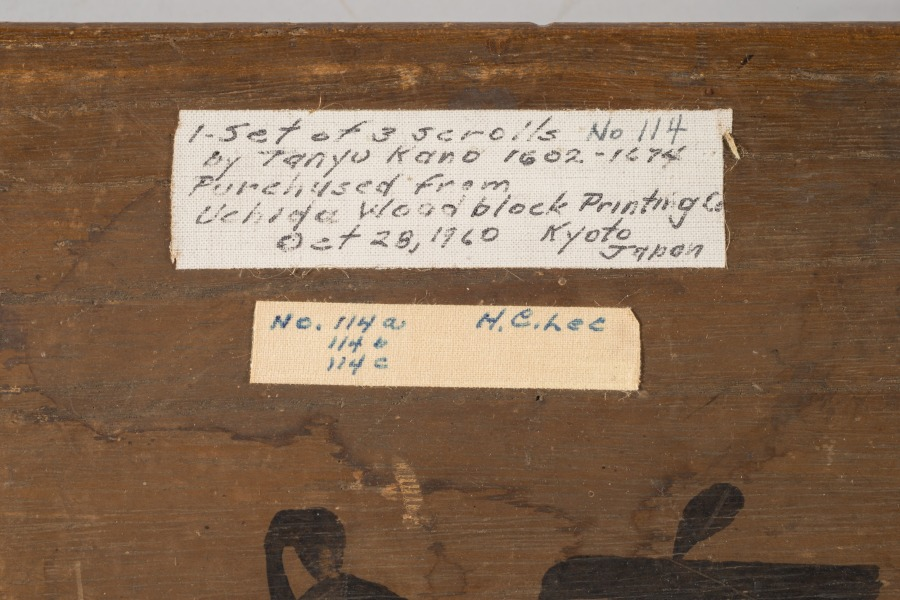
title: Sparrows on Blossoming Plum; A Sage with Tiger; Chinese Bird on Snow-Laden Branch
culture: Japan, Edo period (1615–1868)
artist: Kano Tan’yū (Japanese, 1602–1674)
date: 1661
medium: Triptych of hanging scrolls; ink and slight color on silk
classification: Painting